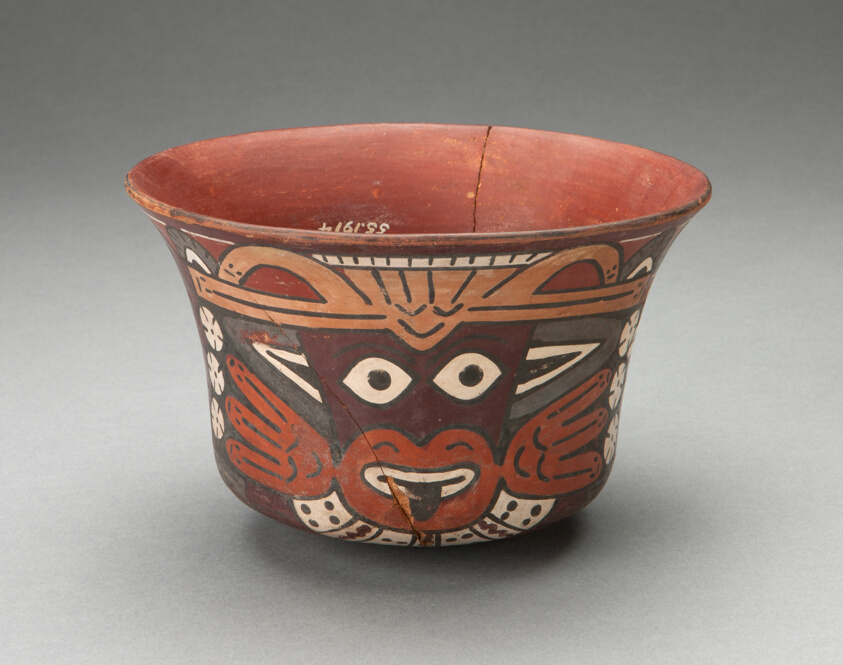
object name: Vessel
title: Bowl Depicting Costumed Ritual Performer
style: nazca, early intermediate period, Pre-Columbian, americas, Arts of the Americas, andean, andes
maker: Nazca; South coast, Peru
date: 180 BCE–500 CE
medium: Ceramic and pigment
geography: Nazca Valley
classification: bowl; earthenware; art of the americas; ceramics; vessel